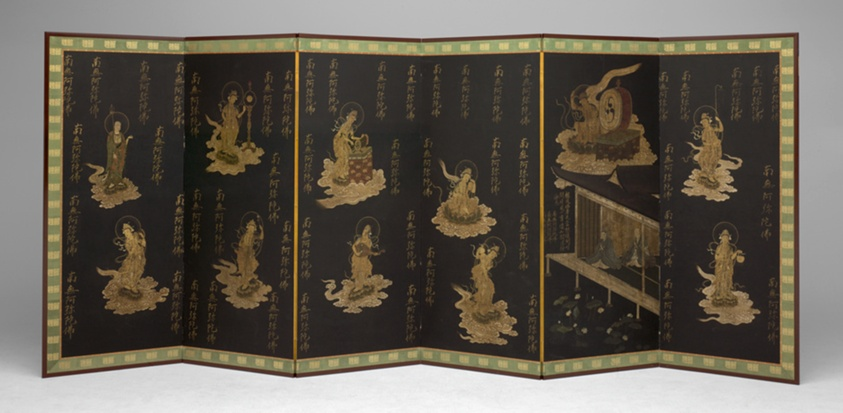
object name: Painting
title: Rebirth of the Nun Anyo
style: Japanese (culture or style)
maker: Artist Unknown; Japanese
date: early 18th century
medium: Pair six-panel screens; ink, colors, and gold on paper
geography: Japan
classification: painting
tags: Buddhism, religion